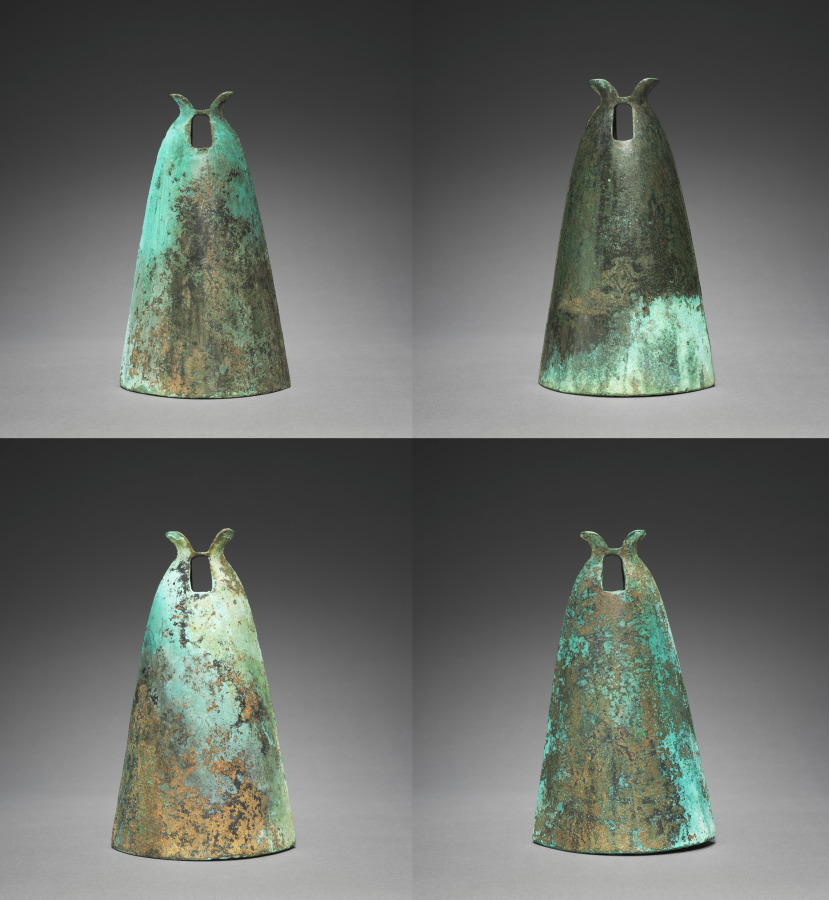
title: Set of Bells with Diamond-Shaped Insignia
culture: China, along the southern borders, Eastern Zhou dynasty (770–256 BCE) to Han dynasty (202 BCE–220 CE)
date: 300s–100s BCE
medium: bronze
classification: Metalwork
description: These rare, elegant bronze bells were made in a tribal village along the southern borders of China. They differ greatly from bells made in the central regions, which often come in large sets and in varying sizes, and feature complex decorative patterns. The distinctive shape of these bells resembles a tall helmet topped by a pair of horns. A rope may have been tied around the horns so that the bells could be suspended. Each bell is decorated with a diamond-shaped insignia—probably to mark tribal affiliation. Although the bells are identical in size, each produces a different tone, which indicates that their casting was a highly refined process.